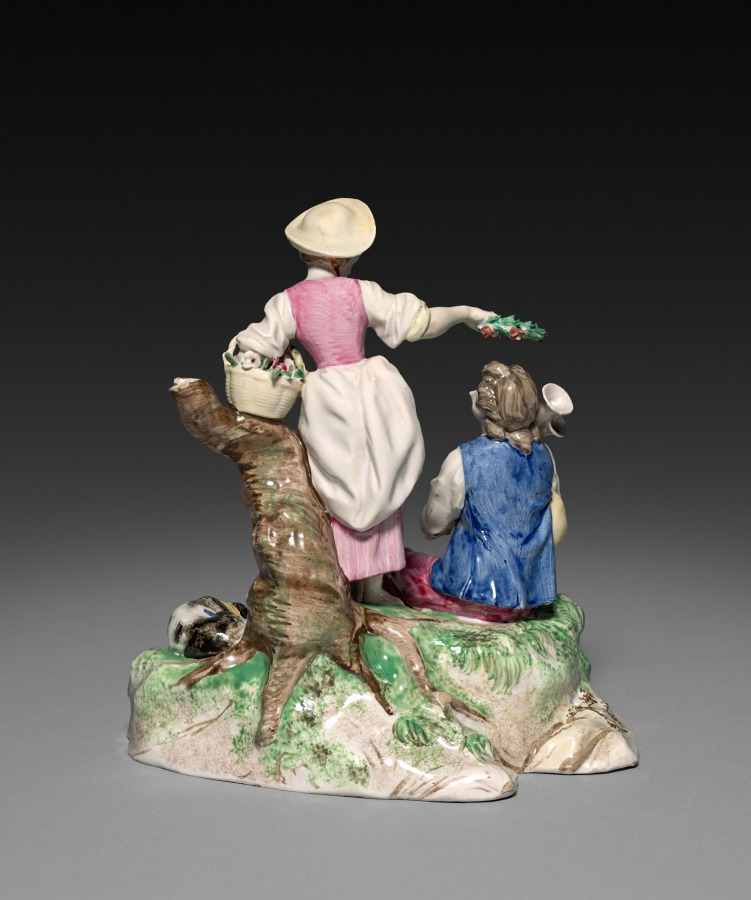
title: Shepherd and Shepherdess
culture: France, 18th century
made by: possibly by Niderviller Factory (French)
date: 1770–1775 ?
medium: faience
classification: Ceramic